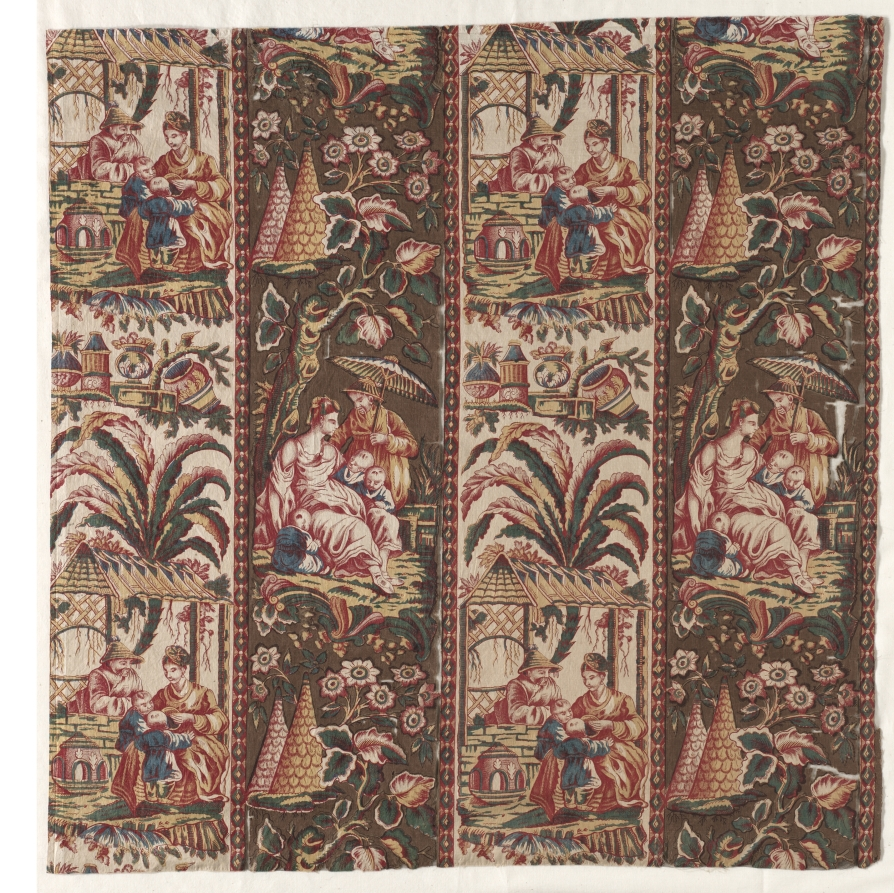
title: Length of Chinoiserie Chintz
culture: England, 19th century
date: c. 1825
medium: roller printed cotton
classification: Textile